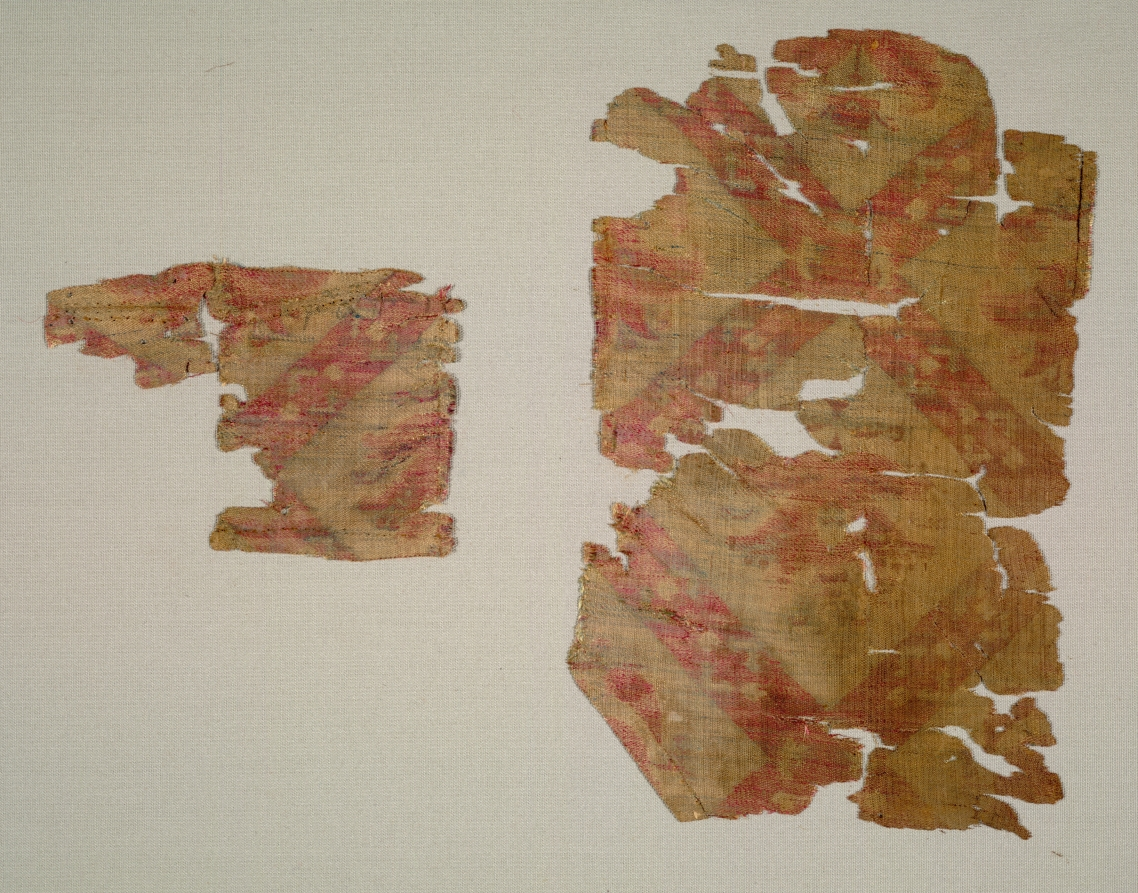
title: Silk Fragments with Palmette Blossoms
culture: Egypt or Syria, Umayyad period (661–750) or Abbasid period (750–1258)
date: 700s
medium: Silk: complementary weft-faced twill with inner warps (samit)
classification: Textile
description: The stunning pattern of palmettes within diamond-shaped compartments is still visible in this rare four-color silk, despite its fragile state. Small human faces within circles appear at the points of the diamonds.